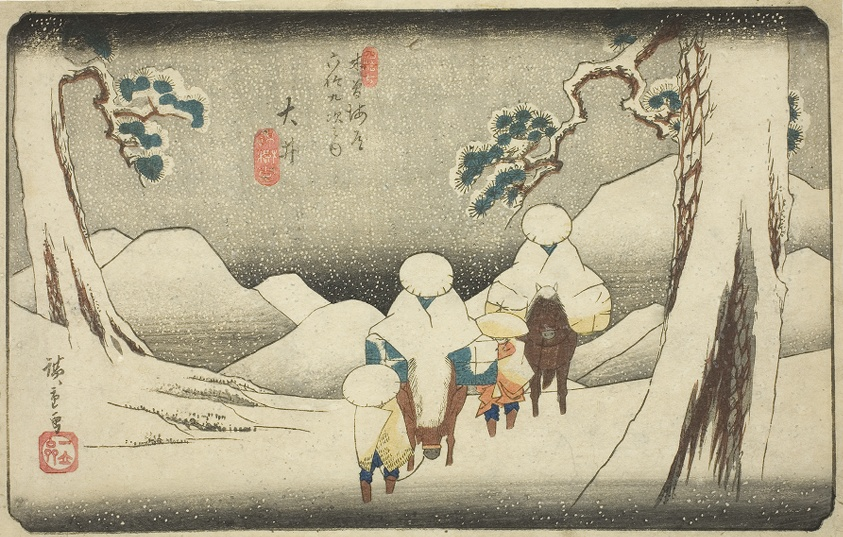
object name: Print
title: No. 47: Oi, from the series "Sixty-nine Stations of the Kisokaido (Kisokaido rokujukyu tsugi no uchi)"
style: Japanese (culture or style)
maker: Utagawa Hiroshige 歌川 広重; Japanese, 1797–1858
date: c. 1835/38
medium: Color woodblock print; oban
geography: Japan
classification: woodblock print; print; asian art